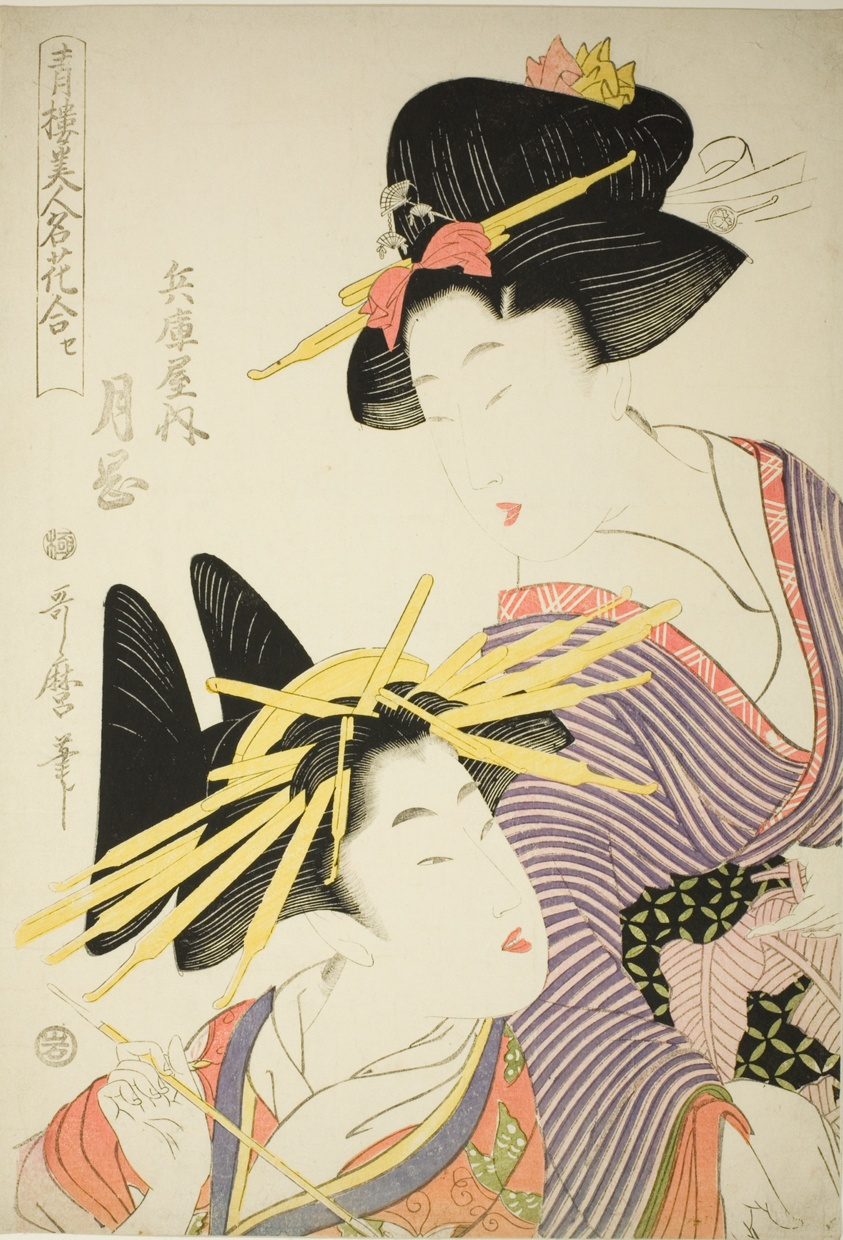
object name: Print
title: Tsukioka of the Hyogoya (Hyogoya uchi tsukioka), from the series "Seiro bijin meika awase"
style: Japanese (culture or style)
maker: Kitagawa Utamaro 喜多川 歌麿; Japanese, 1753 (?)-1806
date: c. 1801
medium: Color woodblock print; oban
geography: Japan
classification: woodblock print; print; asian art